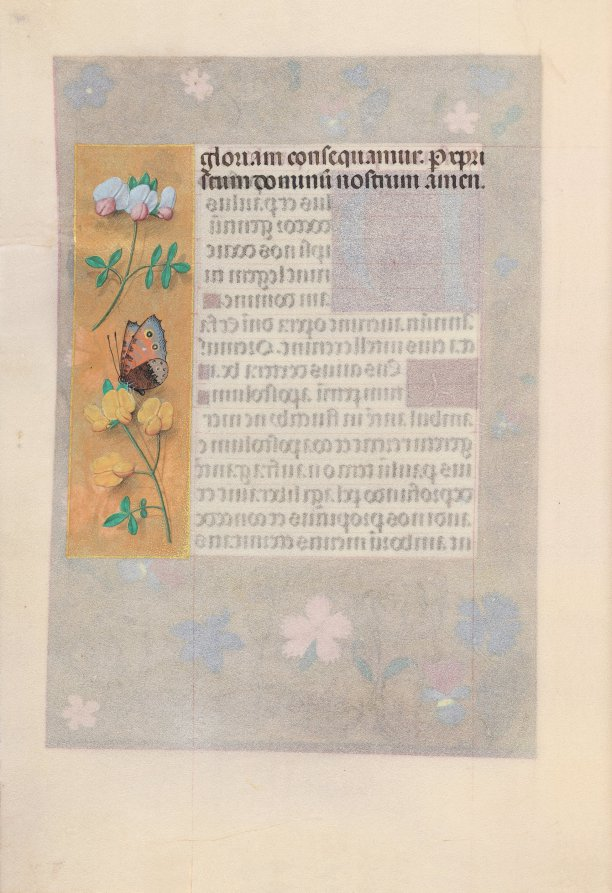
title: Hours of Queen Isabella the Catholic, Queen of Spain: Fol. 174v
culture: Flanders, Ghent and Bruges, late 15th century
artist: Master of the First Prayerbook of Maximillian (Flemish, c. 1444–1519)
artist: and Associates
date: c. 1500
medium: ink, tempera, and gold on vellum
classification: Bound Volume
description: This manuscript was illuminated by a circle of at least five highly organized manuscript painters active in the Flemish cities of Ghent and Bruges. The principal illuminator was Alexander Bening, who painted the majority of the book's miniatures. Manuscripts produced by this circle of artists are renowned for the decoration of their borders, which typically feature a rich variety of realistically-painted flowers, birds, and butterflies. This prayer book, called a book of hours, was intended not for a cleric, but for the private devotions of a lay person-in this case, Isabella the Catholic, Queen of Spain (1451-1504). Isabella's coat of arms embellishes the book's frontispiece. It is unlikely that the book was commissioned by the Queen herself; rather, she probably received it as a diplomatic gift from someone courting her patronage, perhaps Cardinal Francisco Jimenez de Cisneros. A Franciscan friar, Jimenez was dependent upon Isabella for his advancement, first to the post of Queen's confessor in 1492, and then to Archbishop of Toledo in 1495.